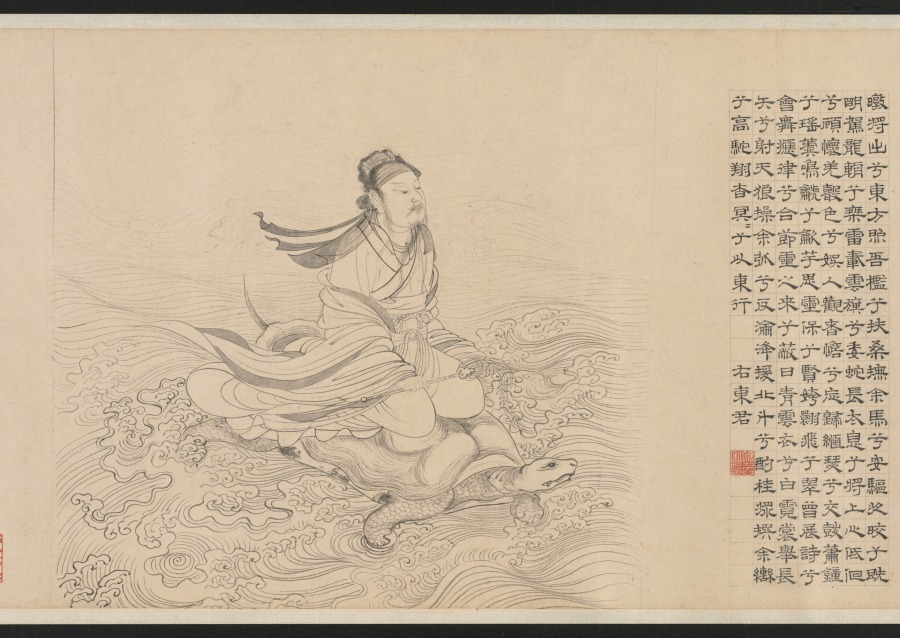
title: Nine Songs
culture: China, Yuan dynasty (1271-1368)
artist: Zhang Wo (Chinese, active c.1336–after 1364)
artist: Chu Huan (Chinese, active 1361)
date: 1361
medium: handscroll; ink on paper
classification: Painting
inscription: 7 colophons and 47 seals: 1 colophon, dated 1361, and 28 seals of Chu Huan 褚奐 (active c. 1361); 1 colophon, dated 1785, and 1 seal of Lu Shihua 陸時化 (1714-1779); 2 seals of Lu Yü-ch'ing (18th c.); 1 colophon, dated 1935, of Ye Gongchuo 葉恭綽 (1881-1968); 1 colophon, dated 1935, of Wu Hufan 吳湖帆(1894–1968); 1 colophon, dated 1938, and 1 seal of Wang Tongyu 王同愈 (1856-1941); 1 colophon, dated 1941, of Wu Huayuan 吳華源 (1893-1972); 1 colophon, dated 1942, and 9 seals of Xu Bangda 徐邦達 (1911–2012); 1 colophon, dated 1942, of Lang Jingshan 郎靜山 (1892-1995); 1 colophon, dated 1944, of Tang Yun 唐雲 (1910-1993); 6 seals of Wang Jiqian [C.C. Wang] 王季遷 (1907–2003).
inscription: Text of The Nine Songs written by Chu Huan at the end of each section.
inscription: 右離騷九歌圖，宋龍溟居士李公本，淮南張渥叔厚所畫妙絕當世。家藏請予書其辭目識于左。至正二十一年辛醜三月旦河南褚奐記。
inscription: Colophon by Lu Shihua 陸時化 (1714–1789): This scroll is fortunate to have been handed down from collections of the right people. Now, after 500 years, its condition is as good as when it was painted. I acquired this from Mr. Shen Guiyu [1673-1769], the President of the Board of Rites. The label is in his handwriting when he was 95 years old. I submit that Chu Huan (t. Shiwen) of the Yuan Dynasty was a native of Qiantang. His "seal" and li writings are in the style of Wu Rui. For example, in [Chu Kuei's] Ming ji lu [A list of masterpieces] is recorded the stele commemorating the restoration of the prefectural school of Kun-shan, the text of which was composed by Yang Weizhen in the twenty-first year of Zhizheng [1361]; and the calligraphy as well as the title in li style was by Chu Huan, who was at that time an assistant judge of the prefecture of Haining in the circuit of Hangzhou. Zhang Wo's zi is Shuhou (叔厚). His literary name is Zhen Qisheng (贞期生). According to [Gu Ying's] Yu shan cao tang ya jii, he liked to paint in the bai-miao or the "pure delineation" style after the method of Li Longmian [Li Gonglin 李公麟], which finds no peer among the ancient masters. This is agreed upon [by Pei Ch'iung] in his Qing jiang zhi who praised [Zhang Wo] as being quite learned and well-versed in many branches of the arts, especially figure painting. Recorded by Lu Shihua [The mountain dweller], listening to the pine, in the twelfth month of the yisi year [1785].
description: Painted in the baimiao, or fine-line drawing style, this ancient work demonstrates the literati’s use of abstract calligraphic brushwork for self-expression. The subject of the “Nine Songs”—songs associated with shamanistic rituals in the ancient Chu kingdom—had traditionally provided artists with myths and legends that they could explore and reinterpret in their own works.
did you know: Divided into eleven sections, the scroll contains illustrations by painter Zhang Wu followed by a transcription of the relevant verse by calligrapher Chu Huan.